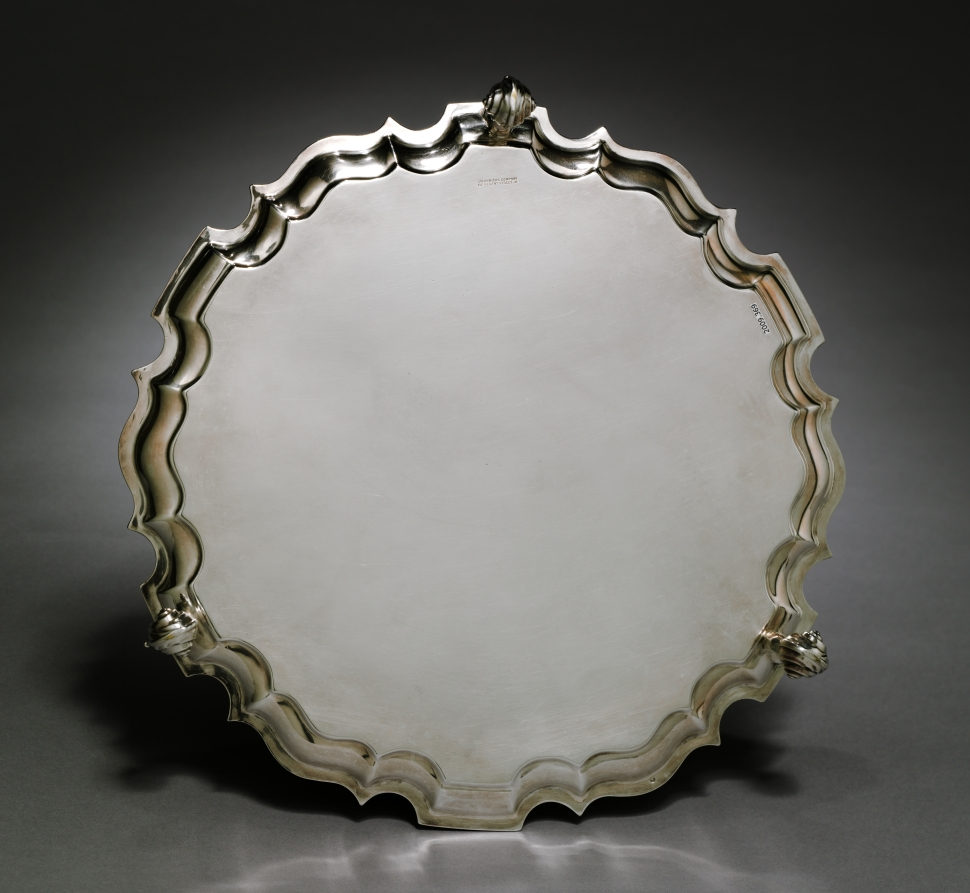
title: Salver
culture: England, London, 20th century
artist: Goldsmiths & Silversmiths Co. (British)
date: c. 1910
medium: silver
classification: Silver